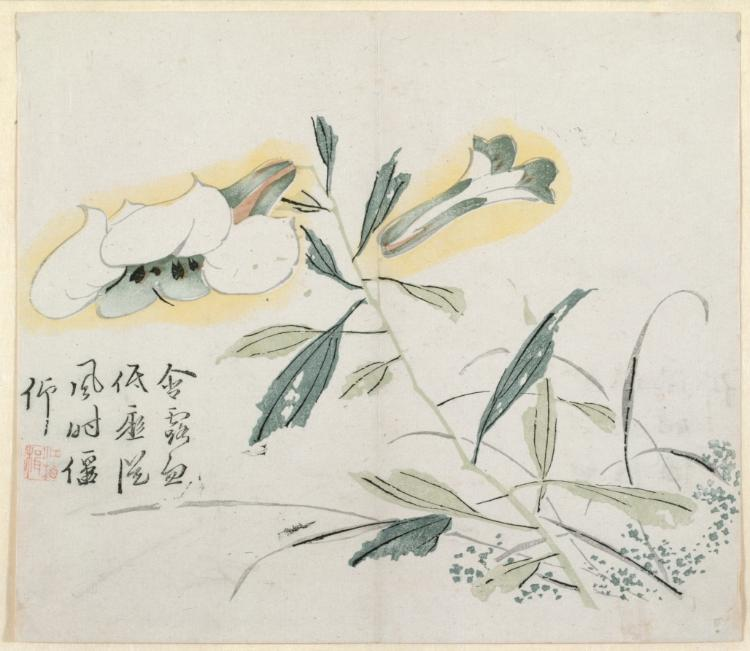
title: Flowering Lily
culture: China, Qing dynasty (1644-1911)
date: 18th Century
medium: color woodblock print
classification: Print